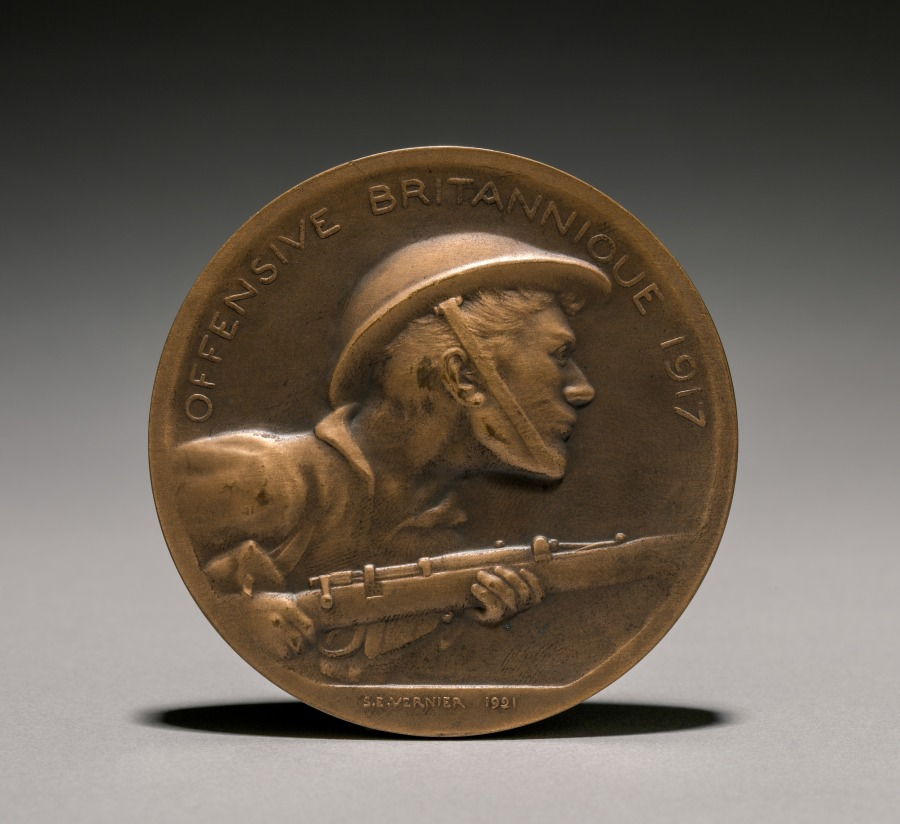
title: Medal (obverse)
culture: France, early 20th century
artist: Èmile Séraphin Vernier (French, 1852–1927)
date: 1921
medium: bronze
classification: Metalwork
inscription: "Offensive Brittanique 1917"; signed: "S. E. Vernier, 1921."